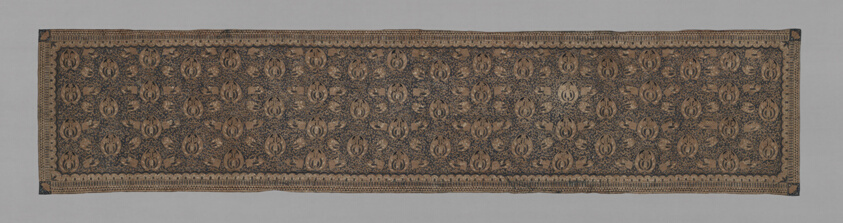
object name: Costume and Accessories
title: Slendang (Shawl)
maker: Indonesia, Java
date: 19th century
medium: Cotton, batik dyed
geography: Java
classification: textile; weaving; costume; dress (garment); clothing